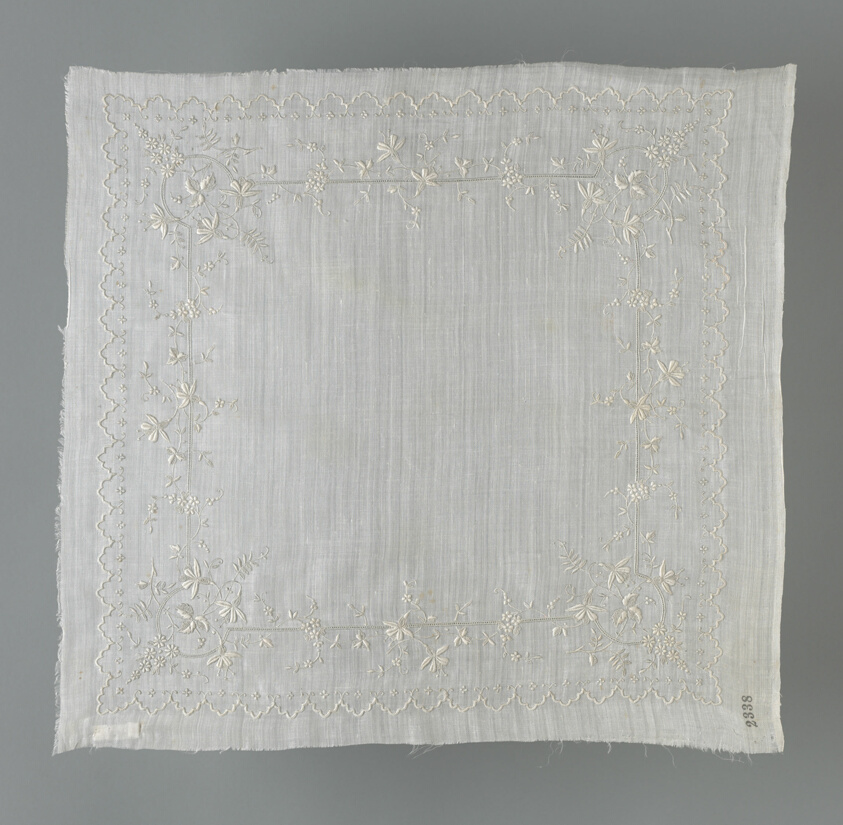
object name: Textile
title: Handkerchief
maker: Switzerland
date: 1892/1900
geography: Switzerland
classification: textile; needlework (visual works); weaving; accessories (object genre)